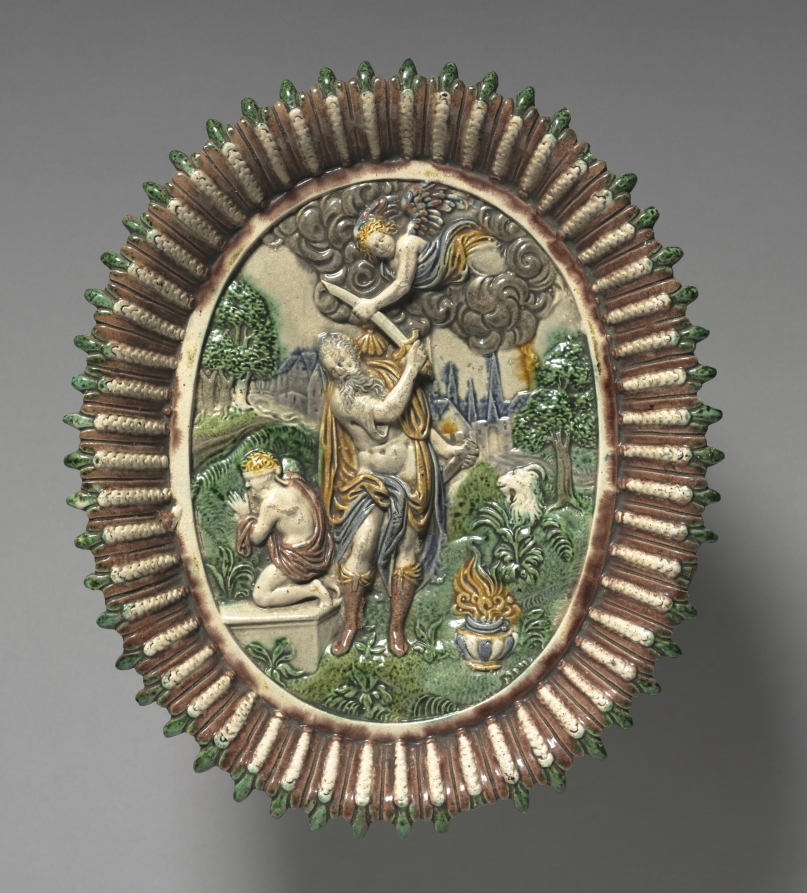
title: Plate: The Sacrifice of Isaac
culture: France, 16th century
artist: circle of Bernard Palissy (French, 1510–1589)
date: late 1500s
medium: lead-glazed earthenware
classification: Ceramic